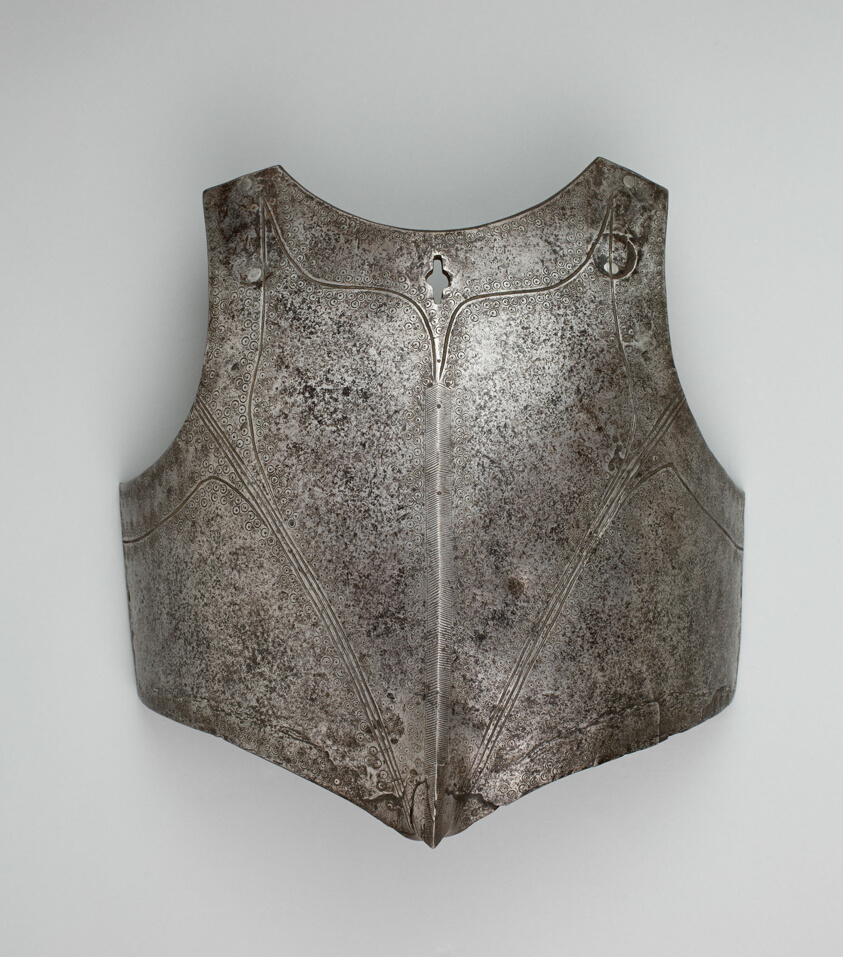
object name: Armor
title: Reinforcing Breastplate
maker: German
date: 1610-20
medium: Steel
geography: Germany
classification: suit-element; armor; arms and armor